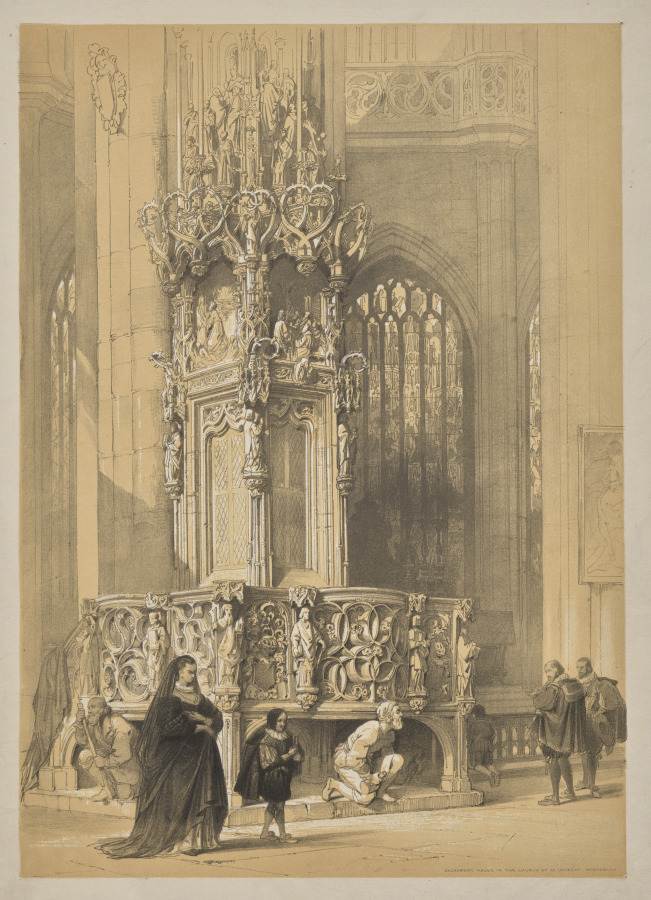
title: Sketches in Belgium and Germany, First Series, Sacrament House in the Church of St. Laurent, Nuremberg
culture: England, 19th century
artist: Louis Haghe (British, 1806–1885)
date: 1845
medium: lithograph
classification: Print